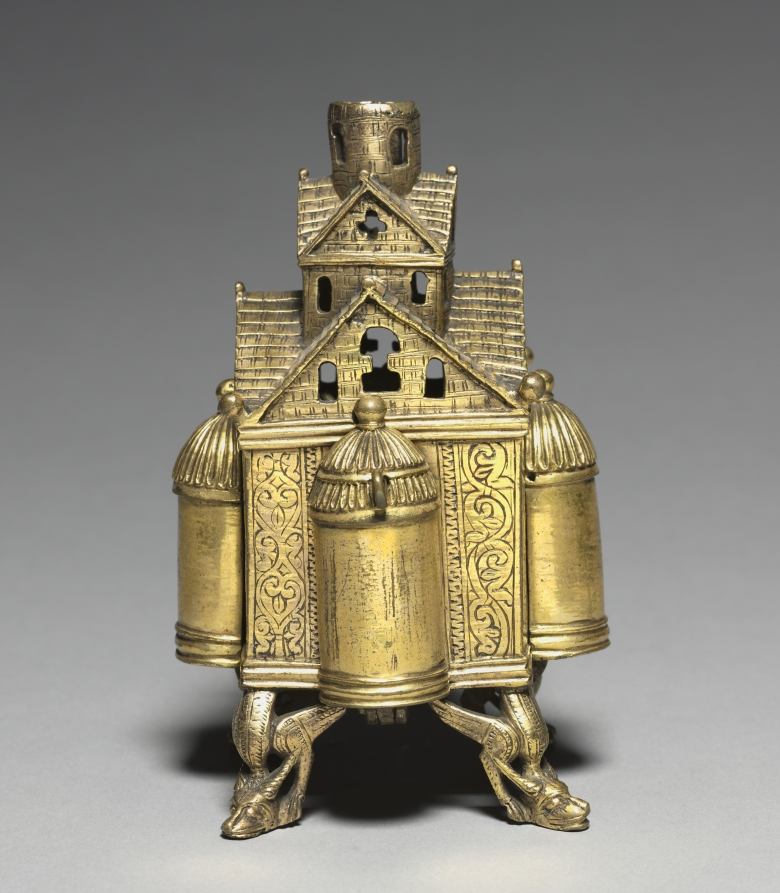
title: Incense Burner and Stand for an Altar Cross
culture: Germany, Lower Saxony, Hildesheim?, Romanesque period, 12th century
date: 1150–75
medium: bronze: cast, gilded, engraved, and chased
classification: Metalwork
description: Supported by dragon-shaped feet on its corners, this unusual object is fashioned like a small, centralized church with gabled roofs, a lantern crowned by a turret, and four semi-circular apses. Traces of soot on the interior walls of a nearly identical object in the Kunstgewerbemuseum in Berlin indicate that these objects once served as incense burners. The objects’ design with an open turret in the center of the roof further suggests that they may have doubled as stands for altar crosses. The fact that both objects formerly belonged to the Bouvier Collection in Amiens may be taken as an indication that they were made as a pair in the same 12th-century workshop.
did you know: This object may been have created for a traveling court with its entourage to use for Catholic Mass, where incense could be used in an easily transportable vessel.